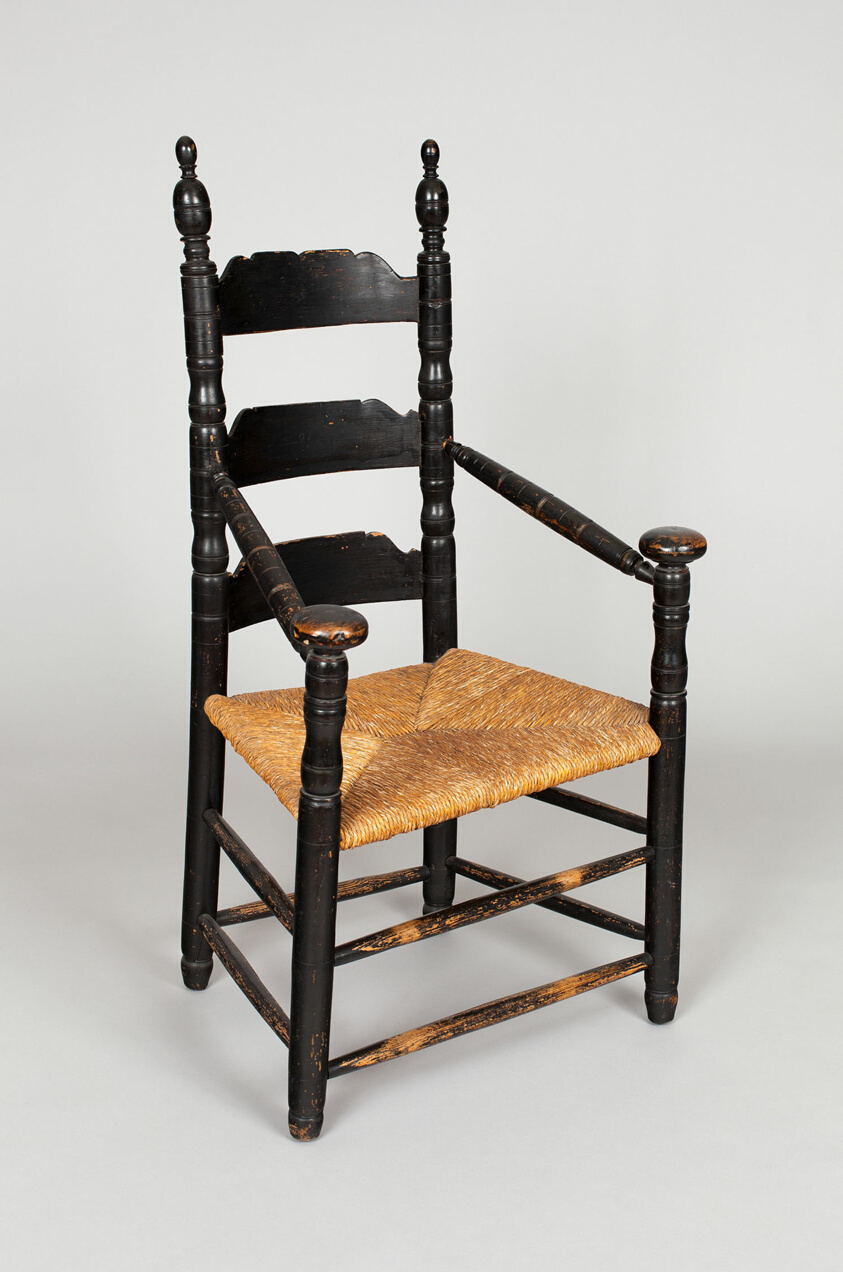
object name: Furniture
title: Armchair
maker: Artist unknown (American, 17th–18th century); Norwich or Lebanon, New London County, Connecticut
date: 1660–1715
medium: Maple, ash, and paint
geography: Norwich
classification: seating; furniture; american decorative arts; american arts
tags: furniture